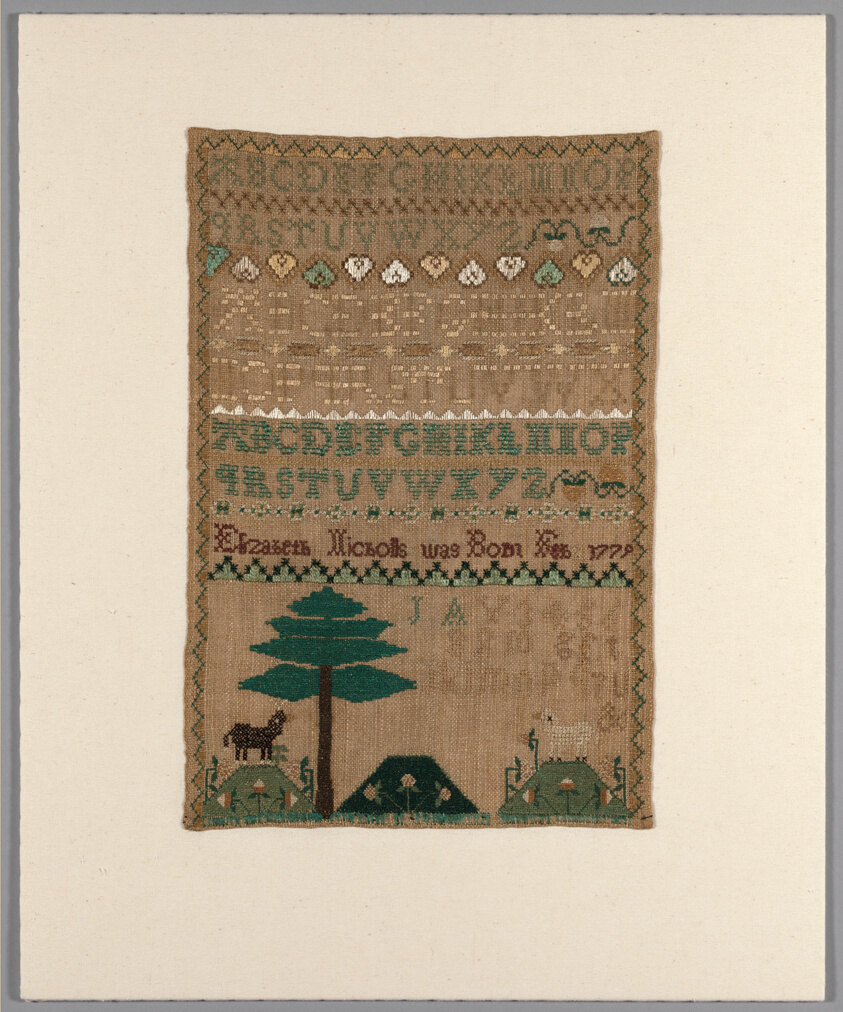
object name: Textile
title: Sampler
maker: Elizabeth Nicholls (American, 1779-?); United States, Massachusetts or New Hampshire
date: c. 1785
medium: Linen, plain weave; embroidered with silk in cross, eyelet, and satin stitches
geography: United States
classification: textile; needlework (visual works); sampler